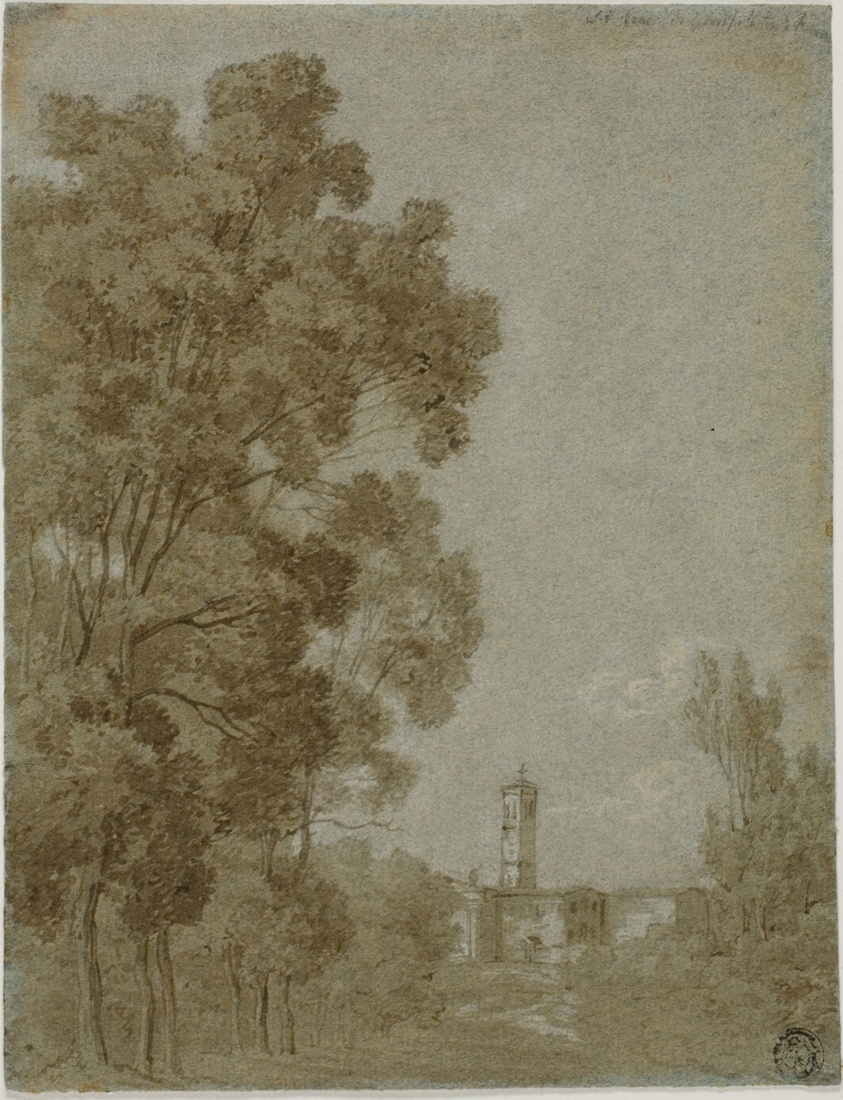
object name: Drawing and Watercolor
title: Roman Landscape with View of Church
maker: Gaspard Dughet (French, 1615-1675)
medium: Pen and brown ink, with brush and brown wash, heightened with lead white (discolored), on blue laid paper, incised and blackened on verso for transfer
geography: France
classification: pen and ink drawings; ink or chalk wash; paper; brush and wash; drawings (visual works); prints and drawing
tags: landscapes